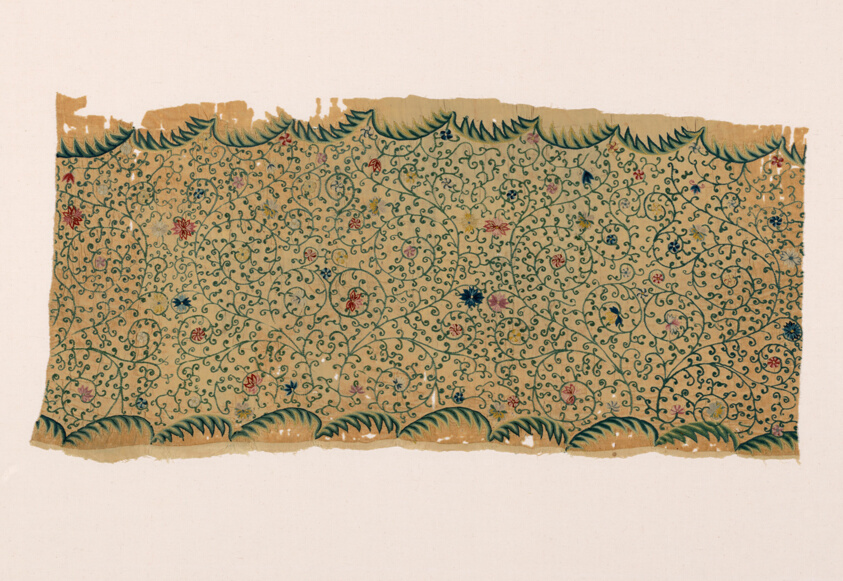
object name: Textile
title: Panel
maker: England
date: 1701/25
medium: Wool, plain leave; embroidered with wool in chain stitch and French knots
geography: England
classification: textile; needlework (visual works)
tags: flowers